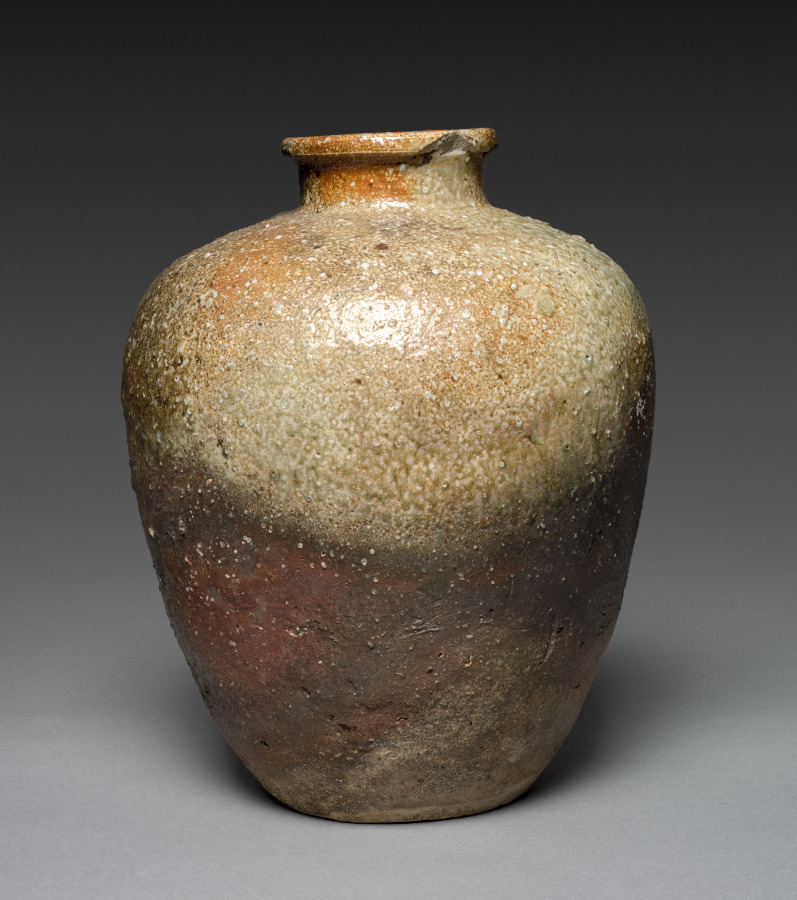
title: Storage Jar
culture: Japan, Muromachi period (1392–1573)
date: 1500s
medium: Stoneware with natural ash glaze (Shigaraki ware)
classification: Ceramic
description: Shigaraki ware is produced in the Shigaraki area of Shiga prefecture to the east of Kyoto in the Kansai region. The clay from Shigaraki has a warm orange color. When fired in an anagama kiln, a type of wood-fired kiln that uses the oxidization process, the free flow of air allows for the appearance of the ash and mineral glazes that characterize the works. Shigaraki storage jars like this one, a tsubo, have been popular for storing tea leaves since the Muromachi period.